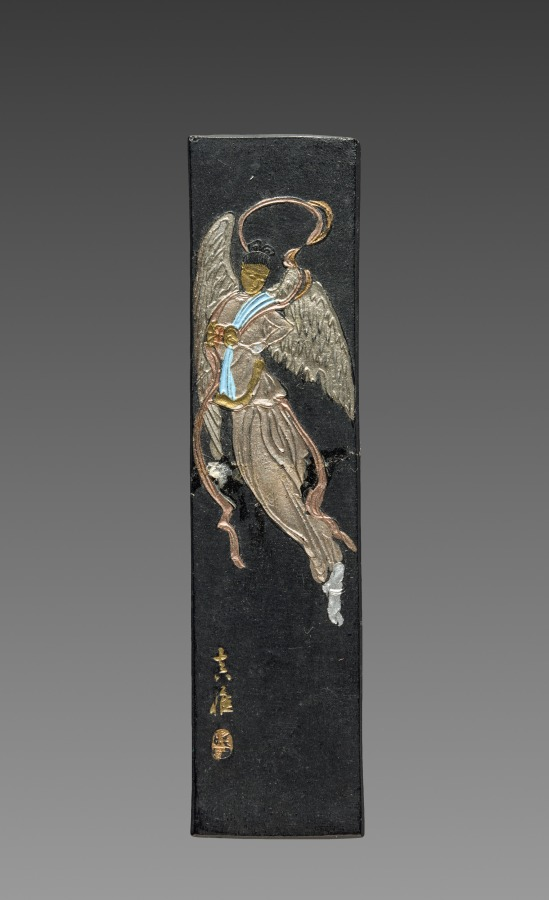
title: Ink Cake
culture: China, Qing dynasty (1644-1911)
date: 1644–1911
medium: ink cake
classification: Miscellaneous